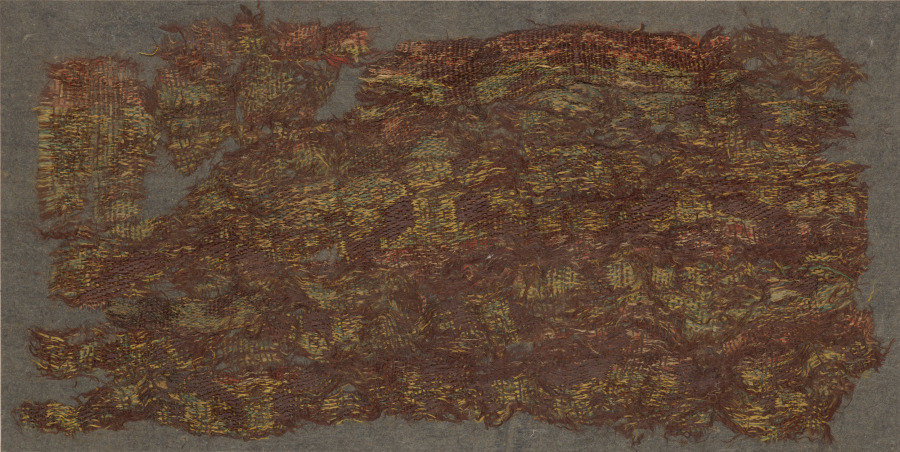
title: Fragment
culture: China or Japan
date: 700s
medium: compound twill, silk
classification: Textile